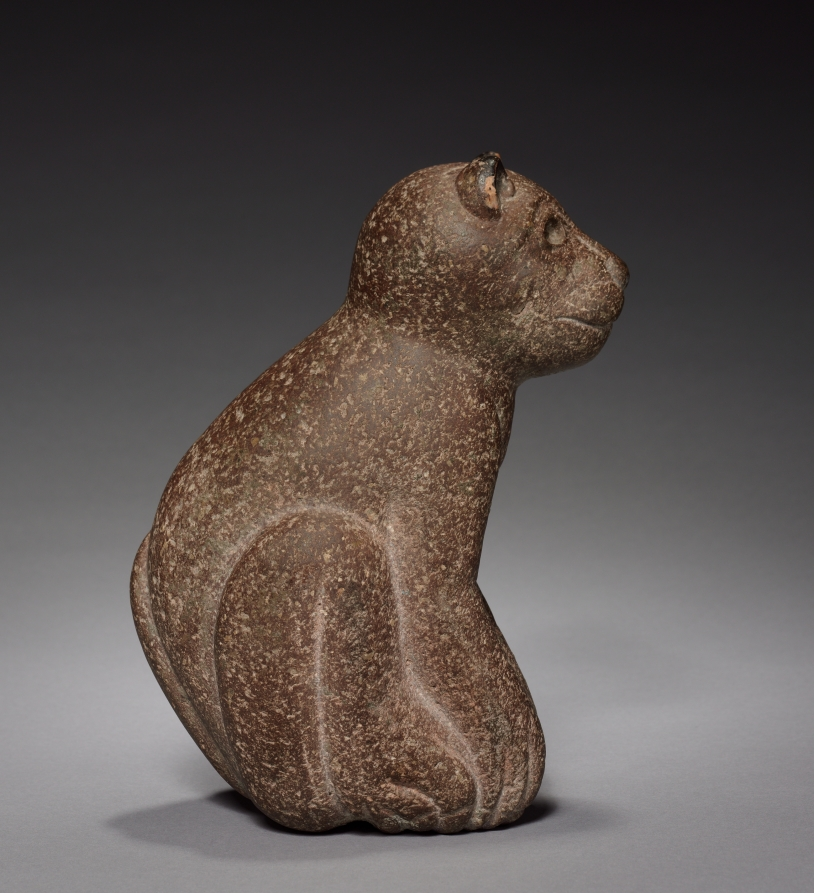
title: Feline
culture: Central Mexico, Aztec, 13th-16th century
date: c. 1200–1519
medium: stone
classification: Sculpture